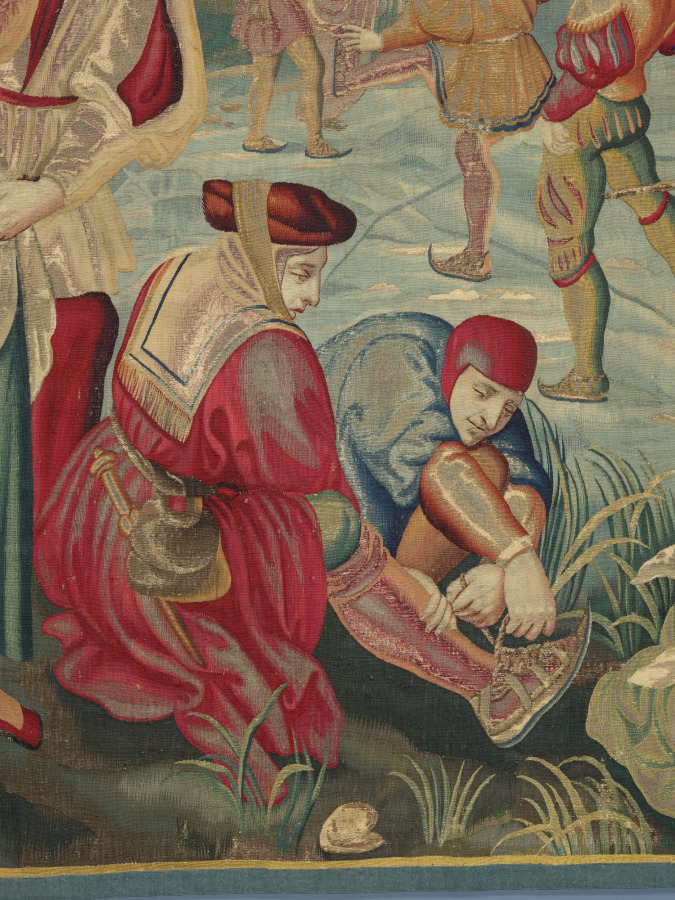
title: Winter: Skating Scene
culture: France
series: Four Seasons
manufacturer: possibly by Gobelins Manufactory (France, Paris, est. 1662)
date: designed c. 1535, woven mid- to late 1600s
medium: Wool, silk, and gold filé: tapestry weave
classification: Tapestry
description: People of all classes and ages enjoyed ice skating, a winter pastime popularized in the Netherlands. Here, some couples are already skating and slipping on the ice, while others tie on their skates or huddle around braziers (portable coal heaters) to keep warm. One affectionate couple in the foreground hold hands as they walk. A castle on the far edge of the frozen lake occupies the background. In the left distance, several small figures holding ladders and long hooks run toward a building that has caught on fire, a frequent occurrence in the winter when wooden houses were heated by fireplaces.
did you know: If you look closely you can see that the top edge of this scene is missing; look at the top of the castle on the right or the forest fire on the left.